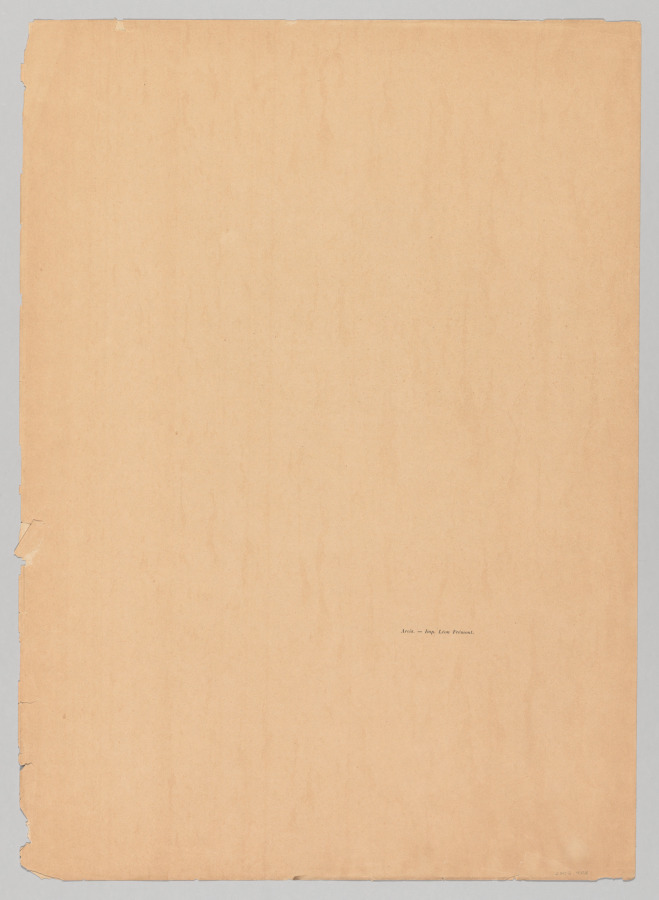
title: The Vintages: The Vintages!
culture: Belgium, 19th century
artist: Henri de Groux (Belgian, 1867–1930)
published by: L'Estampe Originale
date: 1894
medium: letterpress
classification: Print